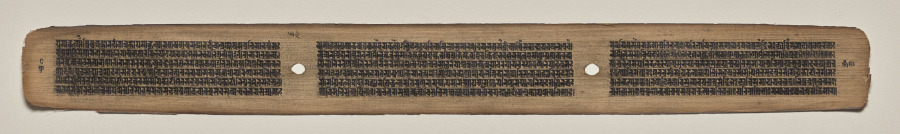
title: Text, Folio 59 (verso), from a Manuscript of the Perfection of Wisdom in Eight Thousand Lines (Ashtasahasrika Prajnaparamita-sutra)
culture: Eastern India, Bihar, Vikramashila Monastery. Painting: Nepal, Kathmandu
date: Sunday, September 14, 1119 (year 239 of the Newar Samvat in the month of Ashvina)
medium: gum tempera and ink on palm leaves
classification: Painting